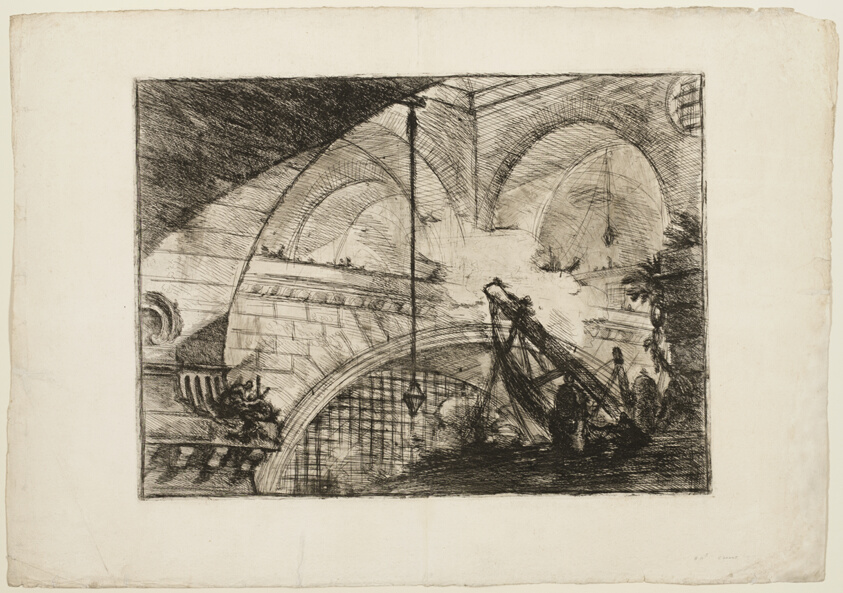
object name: Print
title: The Arch with a Shell Ornament, plate 11 from Imaginary Prisons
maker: Giovanni Battista Piranesi (Italian, 1720-1778)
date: c. 1750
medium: Etching and engraving on heavy ivory laid paper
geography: Italy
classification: etching; print; prints and drawing